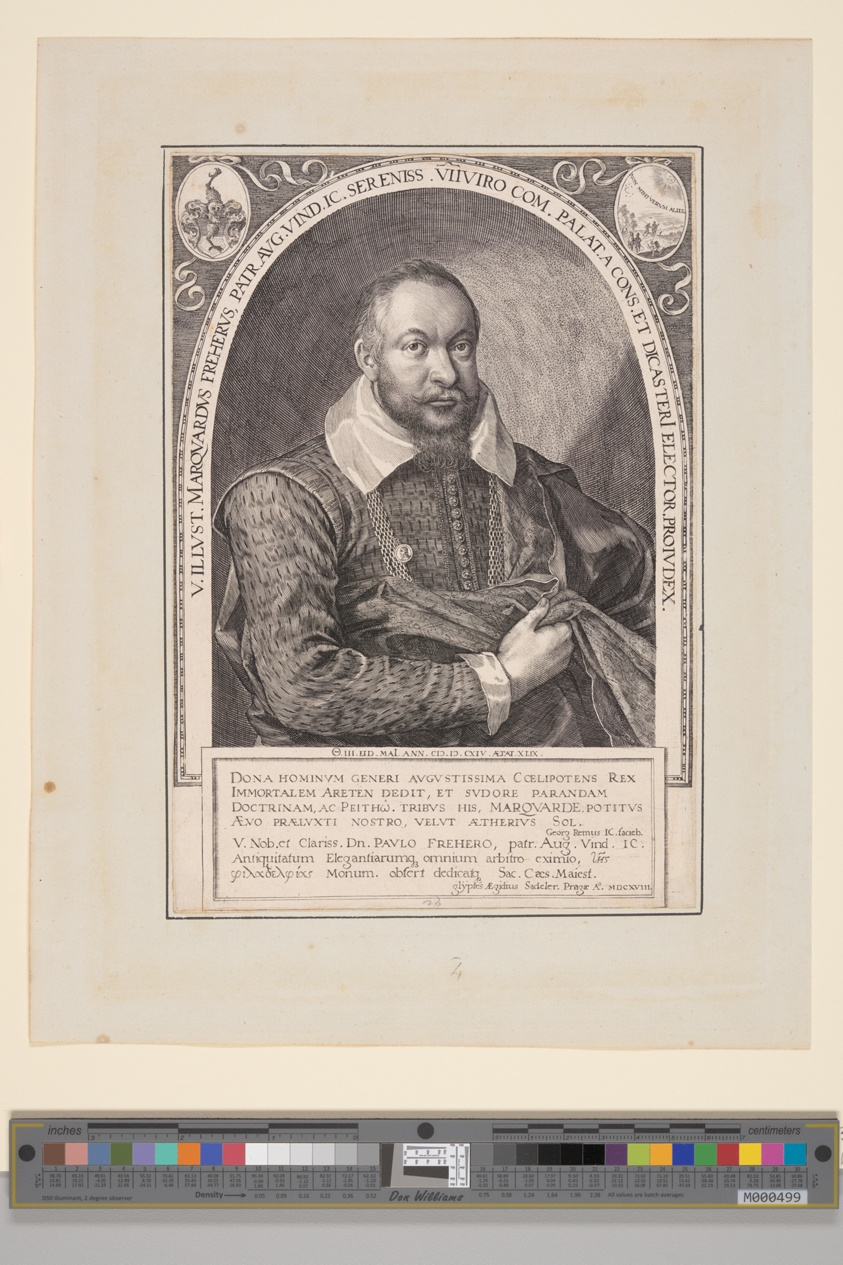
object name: Print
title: Marquard Freher, Diplomat, Historian, and Jurist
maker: Aegidius Sadeler II; Flemish, c. 1570–1629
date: 1618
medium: Engraving on paper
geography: Flanders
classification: engraving; paper; print; prints and drawing